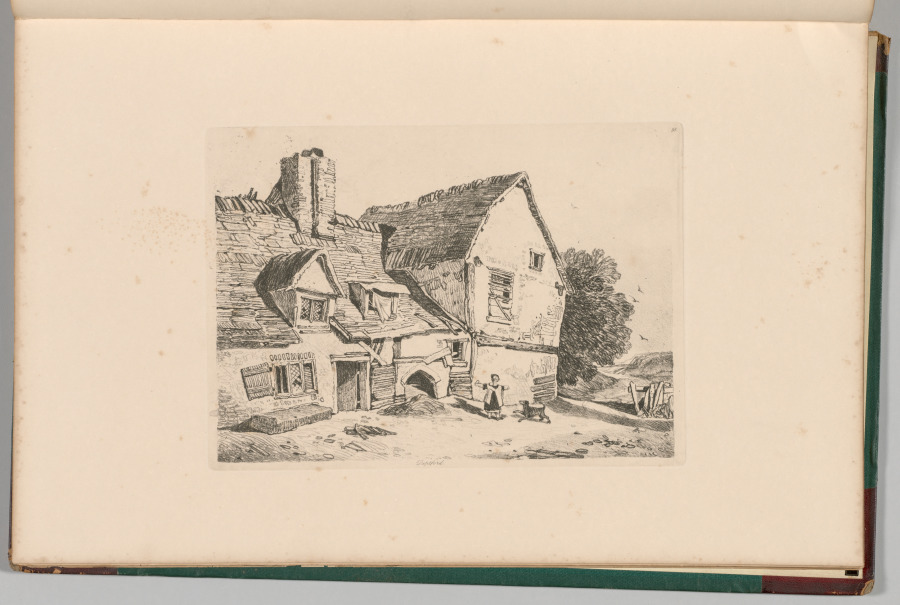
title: Liber Studiorum: Plate 38, View at Deptford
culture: England, 19th century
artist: John Sell Cotman (British, 1782–1842)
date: 1838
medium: softground etching, from a bound volume containing 48 plates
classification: Bound Volume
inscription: In plate, within image, upper right: 38; in plate, below image: Deptford